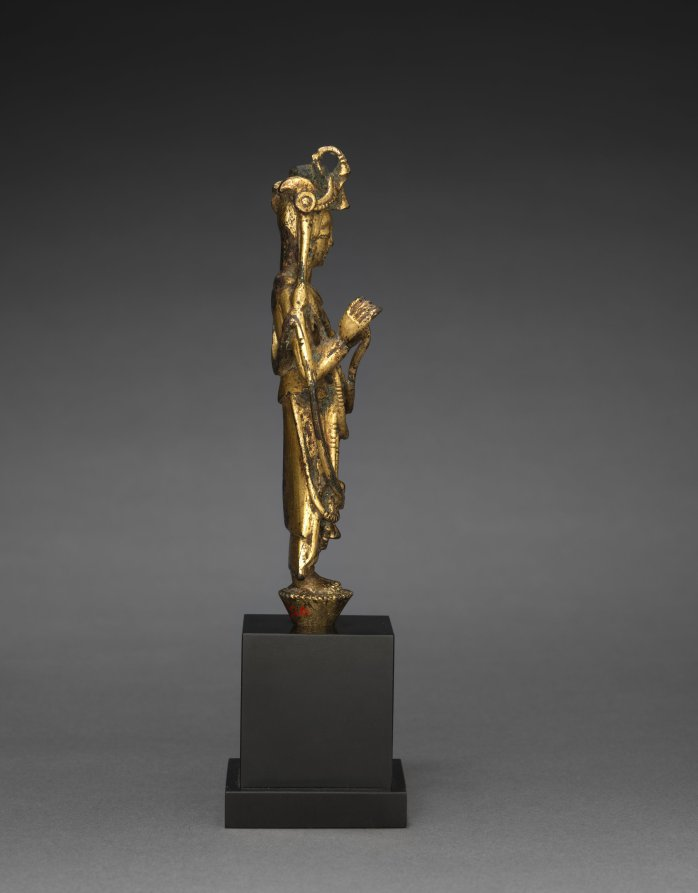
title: Standing Bodhisattva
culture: China, Sui dynasty (581-618)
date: late 500s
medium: gilt bronze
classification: Sculpture